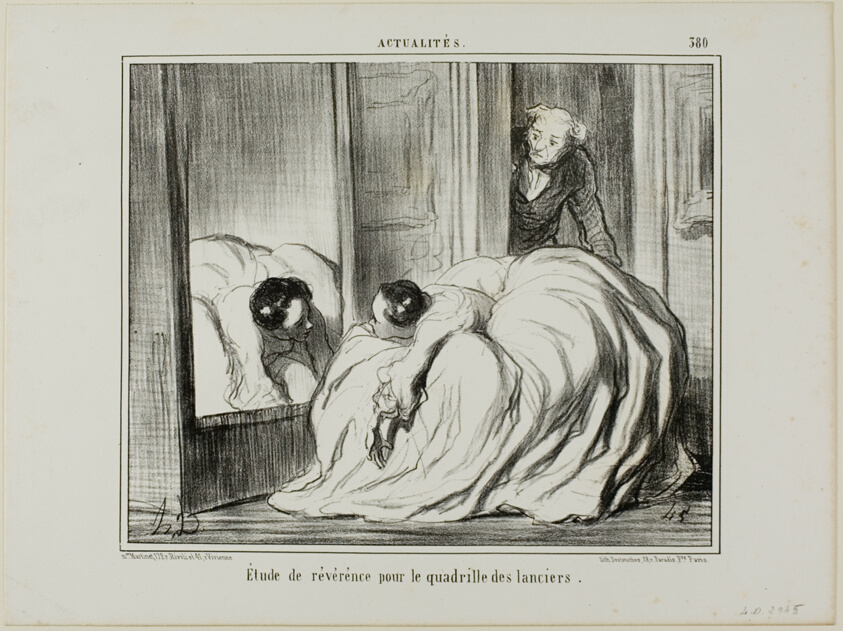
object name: Print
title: Study of Reverence for the Quadrille of the Lancers, plate 380 from Actualités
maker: Honoré Victorin Daumier; French, 1808-1879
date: 1857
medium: Lithograph in black on white wove paper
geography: France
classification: lithograph; print; prints and drawing